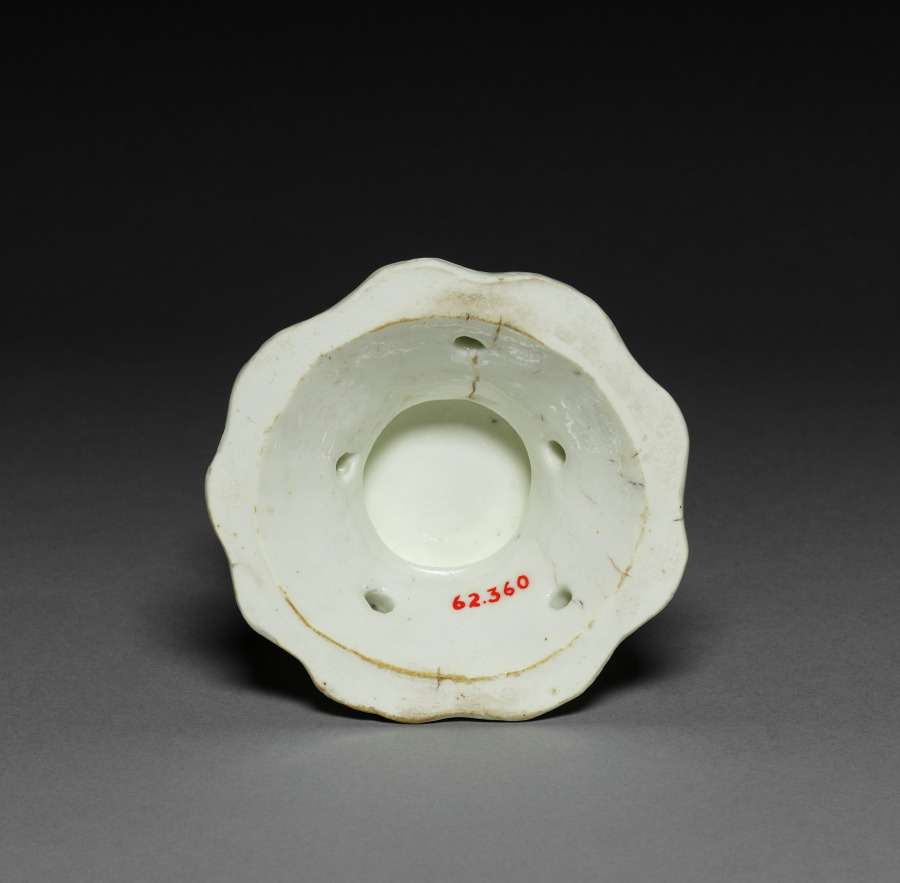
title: Potpourri Vase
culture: France, Saint Cloud, 18th century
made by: Saint Cloud Porcelain Factory (French)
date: mid-1700s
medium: soft-paste porcelain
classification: Ceramic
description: A vase like this was created to contain potpourri, a mixture of flowers, herbs, and spices emitting ambient fragrance. This specific function offered a particularly fertile ground for the development of French porcelain, as manufactories experimented with forms, surface ornamentations, and placement of perforations.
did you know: Prior to Saint-Cloud's development of soft-paste porcelain in the 1690s, rumors spread throughout Europe that the prized material was made by burying a variety of materials, including lobster shells, in the ground for eighty years.